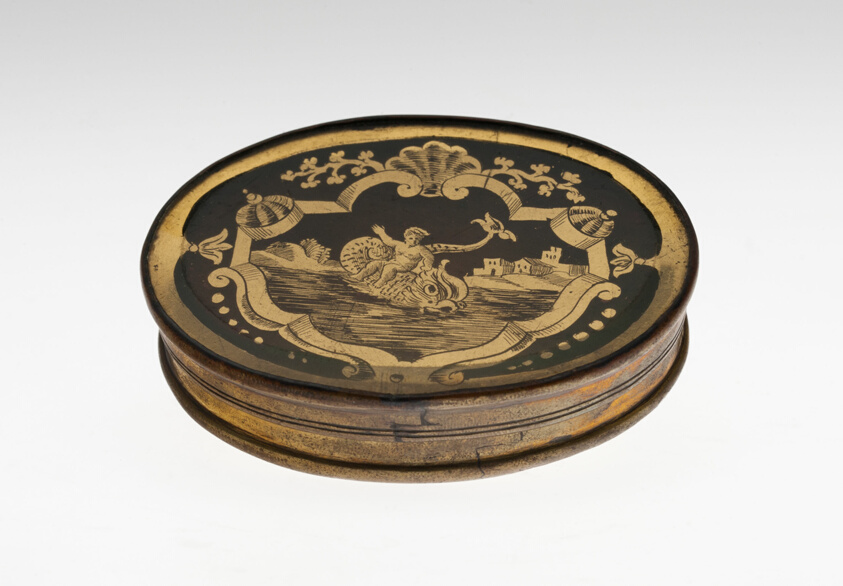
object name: Glass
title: Box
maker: Bohemia, Czech Republic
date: c. 1730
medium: Glass panels mounted with brass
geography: Bohemia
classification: glass; european decorative arts